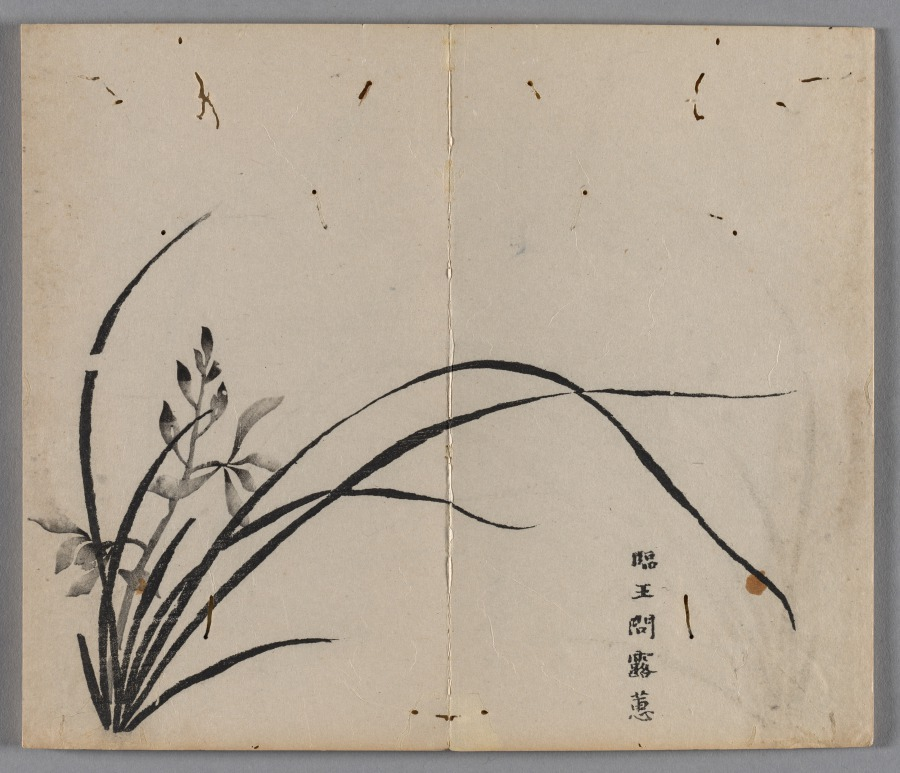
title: Ten Bamboo Studio Painting and Calligraphy Handbook (Shizhuzhai shuhua pu): Orchids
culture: China, Qing dynasty (1644-1911)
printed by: Hu Zhengyan (Chinese, c. 1584–1674)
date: 1633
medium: Woodblock-printed book; ink and colors on paper; first edition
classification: Print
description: Color printing reached a level of perfection in the early 1600s, as seen in this Ten Bamboo Studio Collection of Calligraphy and Painting and the Mustard Seed Garden Manual of Painting (printed 1679 and 1701). The painterly quality, precision in registering (aligning) the woodblocks, and harmonious colors made them the most successful color print editions in Chinese history. Both editions were printed and compiled in Nanjing, spread nationwide, and had a great impact on the arts in Japan and Korea.